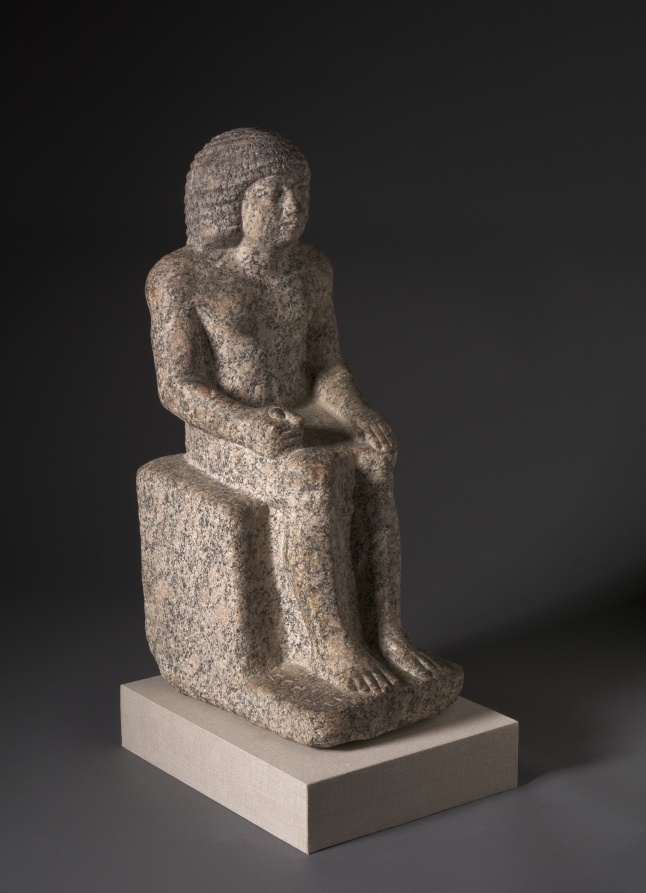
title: Seated Statue of Nykara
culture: Egypt, Old Kingdom (2647–2124 BCE), Dynasty 5, reign of Nyuserre (2445–2422 BCE) or later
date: 2408–2377 BCE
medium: red granite and pigment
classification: Sculpture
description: This statue inscribed on the base for the chief of the granary, Nykara, comes from the same tomb as the false door. A statue of granite was an expensive commodity. Monumental red granite was quarried at Aswan in the south of Egypt and had to be shipped more than five hundred miles downstream to Nykara's tomb in the area of Memphis.